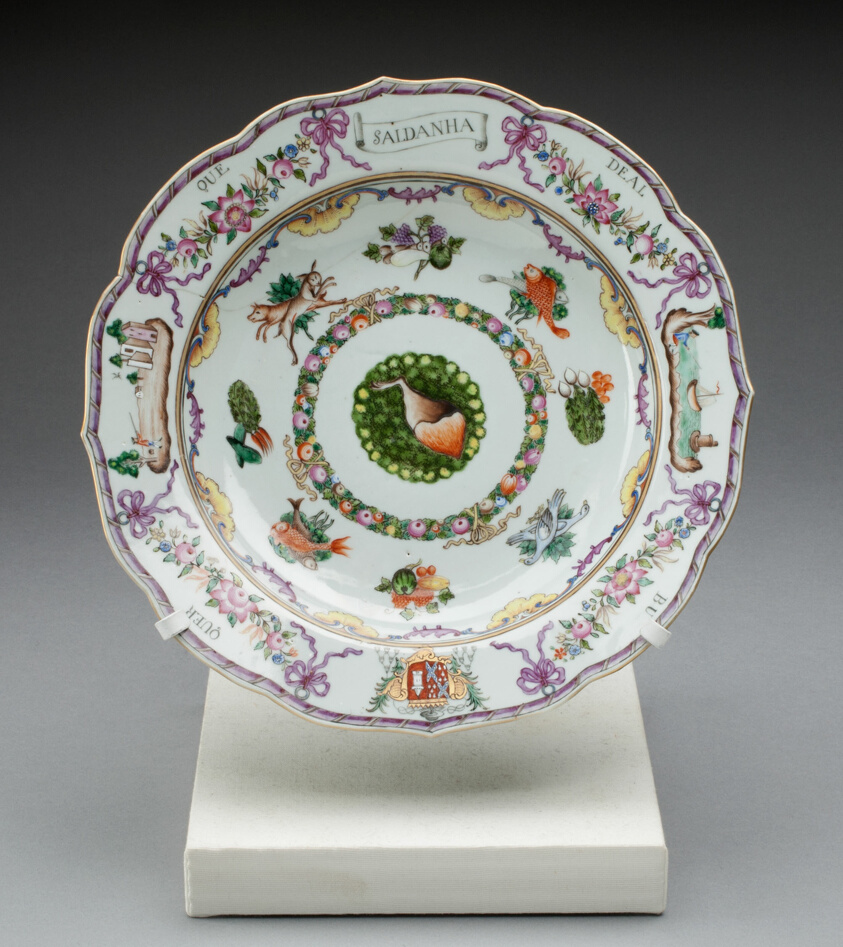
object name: Ceramics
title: Soup Bowl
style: chinese export, Chinese (culture or style), East Asian, asian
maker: China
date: c. 1765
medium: Hard-paste porcelain with polychrome enamels and gilding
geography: Jingdezhen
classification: bowl; dish (vessel); chinese export porcelain; porcelain; european decorative arts; ceramics